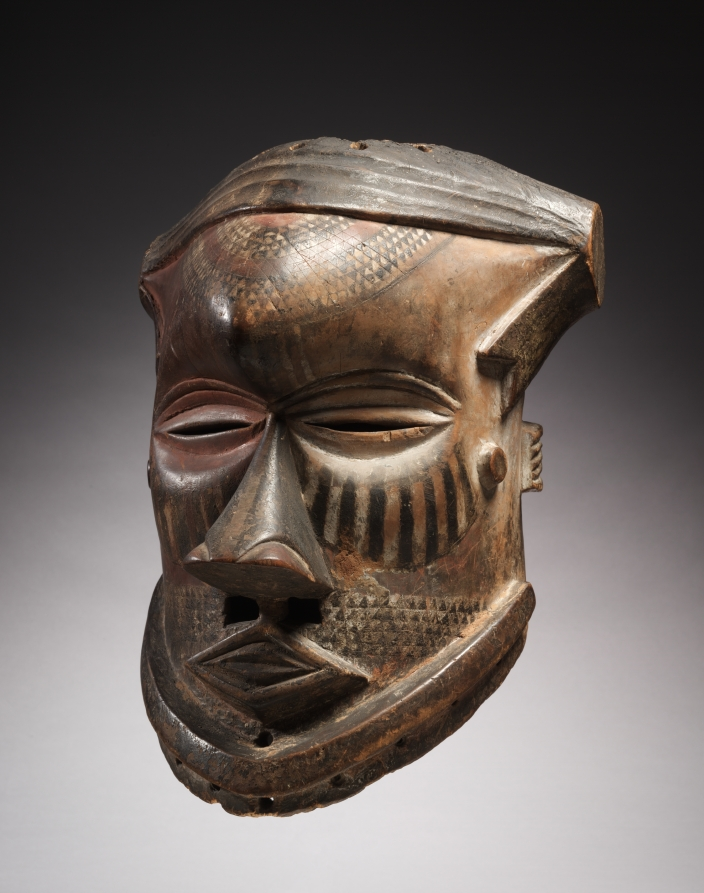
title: Mask (Bwoom)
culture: Africa, Central Africa, Democratic Republic of Congo, Kuba-style carver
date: mid- to late 1800s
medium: Wood and paint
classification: Mask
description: Among the Bushoong, the central Kuba group, the mask known as bwoom—most typically identified as the head of a hunter-gatherer—forms a triad with a female mask and another male mask. All three are protagonists in the reenactment of the foundation of the Kuba kingdom. Outside the capital, however, bwoom appears in different non-royal contexts, such as the men’s initiation society.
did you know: Imagine this mask topped with eagle feathers; they would have been added only on special occasions when it was performed.